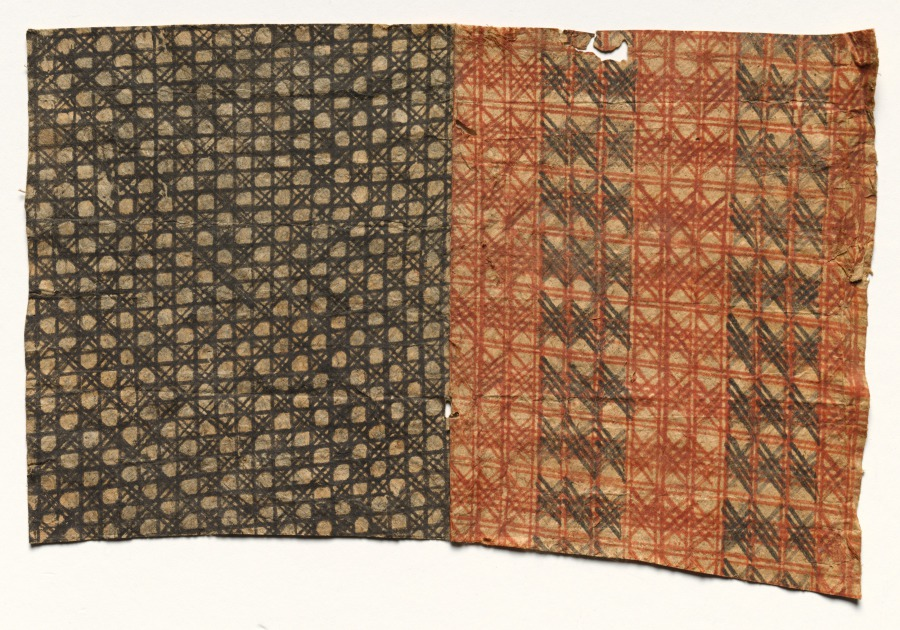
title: Tapa Cloth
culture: Oceania, Polynesia, Hawaii, 20th century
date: before 1930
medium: probably mulberry bark (Broussonetia papyrifera), two pieces joined together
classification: Textile